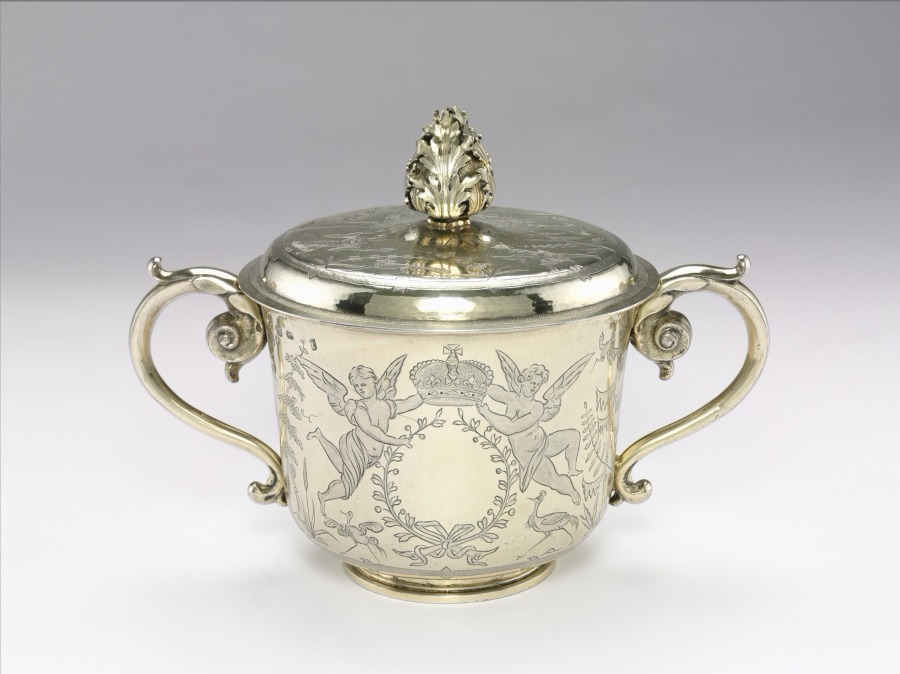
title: Two-Handled Cup and Cover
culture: England, London, 17th century (James II)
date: 1686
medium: silver gilt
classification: Silver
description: Produced a year after the coronation of James II (1633–1701), this silver cup celebrates the monarchy and reflects the political and social alliances that underpinned the aristocracy during the 1600s. During their coronation, James II and his second wife Mary of Modena (1658–1718) were carried through the city of London under a silk canopy adorned with motifs inspired by European perceptions of Chinese art, known as chinoiserie. Following the procession, the thirty-two lords involved in the ceremony were each offered a portion of the cloth from the canopy as well as sixteen troy ounces of silver from the posts. At least two of them commissioned cups adorned with chinoiserie to be made from the silver. While it is unclear if this cup once belonged to one of the thirty-two peers, it was almost certainly created in response to the same motifs and social developments.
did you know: The two female figures lift a crown on the front of this cup that closely resembles Saint Edward’s Crown, the heraldic emblem of the United Kingdom.